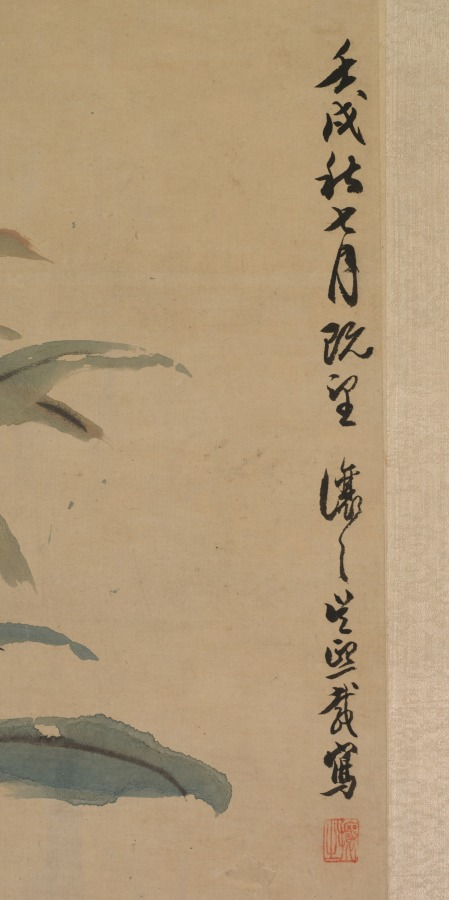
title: Flowering Plants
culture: China, Qing dynasty (1644-1911)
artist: Wu Rangzhi (Chinese, 1799–1870)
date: 1862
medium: hanging scroll, ink and color on paper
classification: Painting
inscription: Signed and dated inscription by the artist with one seal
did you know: Painter and calligrapher Wu Rangzhi was also an expert in seal cutting.